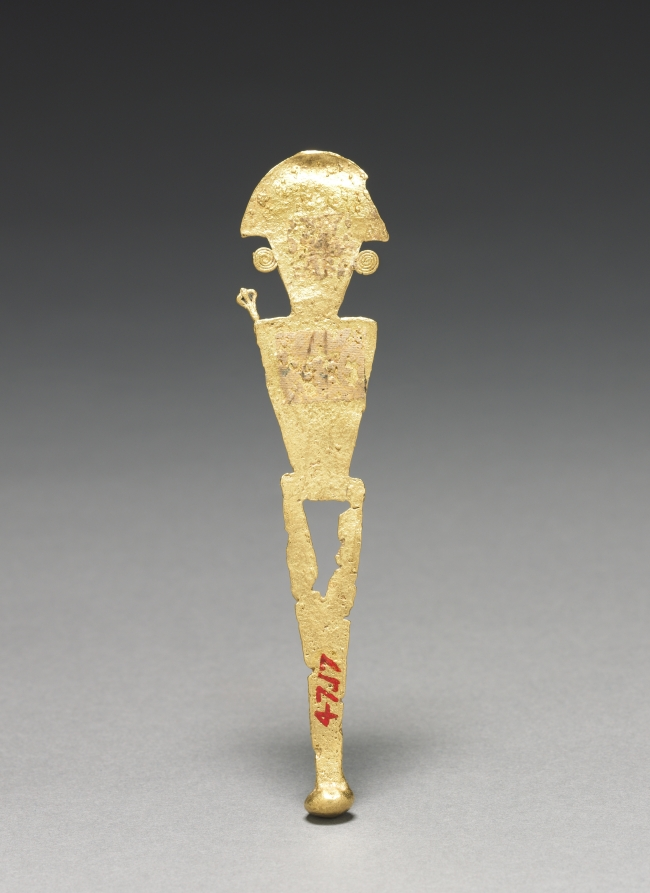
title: Tunjos (Votive Offering Figurine)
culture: Colombia, Muisca style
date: c. 900–1550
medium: cast gold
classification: Metalwork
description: Unlike the other gold ornaments made in the isthmian region, tunjos were not worn; instead, they served as offerings that were deposited in sacred places such as lagoons and caves. They often depict humans who hold something. Perhaps because they were not meant for display, tunjos were not finished after lost-wax casting. Flaws remain uncorrected, surfaces are unpolished, and gold that backed into the channel used to pour the molten metal into the mold was left in place.